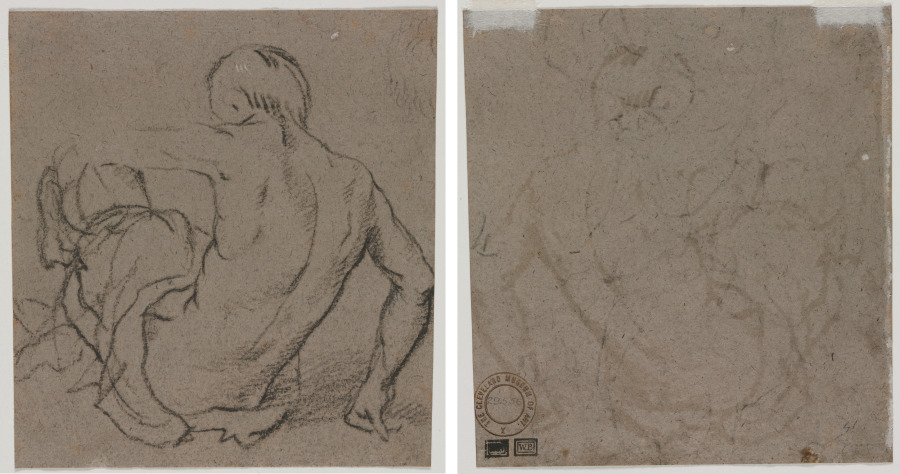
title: Man Seated on the Ground, Seen from Behind (recto); Sketch (verso)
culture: Italy, 16th century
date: 1500s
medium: brush and black wash heightened with traces of white gouache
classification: Drawing